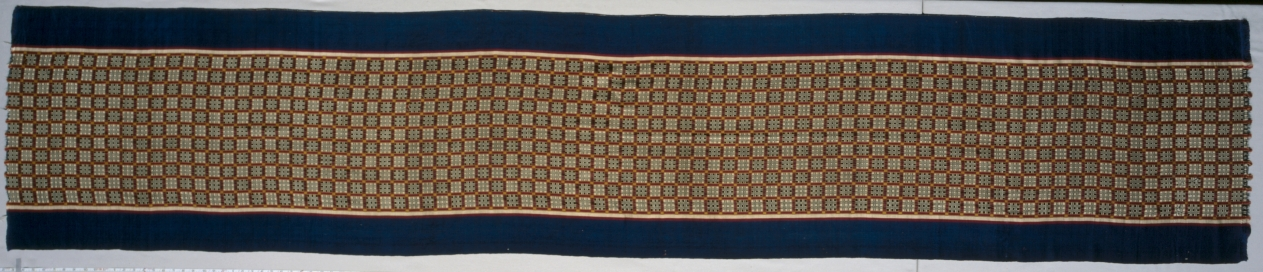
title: Wall Hanging (msimsim)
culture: Africa, North Africa, Morocco, Tétouan, Moroccan weaver(s)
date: 1800s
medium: Silk, dye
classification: Textile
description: Msimsim wall hangings were one of three standard marriage gifts (ṣdāq or mahr) from a groom to a bride in Tétouan, Morocco, as recorded by marriage contracts from 1794 to 1894. These gifts indicated the financial commitment of marriage: divorce occurred if they weren’t promptly received! This msimsim was made from silk harvested in Tétouan, or from raw Asian silk imported via Marseille. Its traditional design is a double-sided gridded brocade (raised woven pattern), navy on one side, crimson on the other. When this was woven, at least 25 professional silk workshops flourished in Tétouan, producing bridal gifts and other goods that outsold European imports.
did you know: Some scholars believe these checkerboard fabrics were traded, and eventually influenced patterns in some West African strip woven textiles.